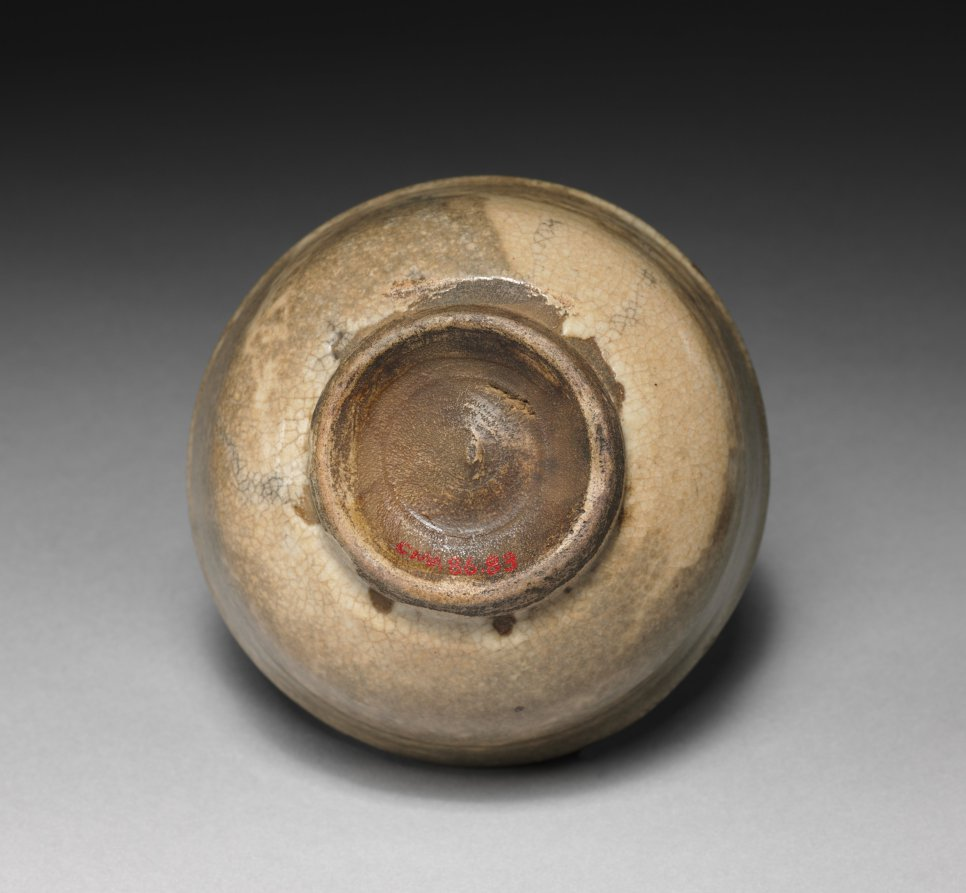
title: Bowl with White-slip Decorations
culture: Korea, Joseon dynasty (1392–1910)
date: 1500s–1600s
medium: glazed stoneware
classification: Ceramic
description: This type of wide-mouthed bowl was used every day in Korea, not exclusively for tea drinking. But when it was introduced to Japan around the early 1500s, its imperfect appearance, which evokes the aesthetics of wabi-sabi, caused it to be repurposed as a tea bowl. Korean tea bowls were circulated as a item of foreign luxury among Japanese military elites. Many Korean potters were abducted during the Japanese invasions (1592–98). Some settled there, and ended up leading the development of ceramic industry in Japan.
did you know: This type of humble tea bowl was highly praised among Japanese collectors for its imperfect beauty.